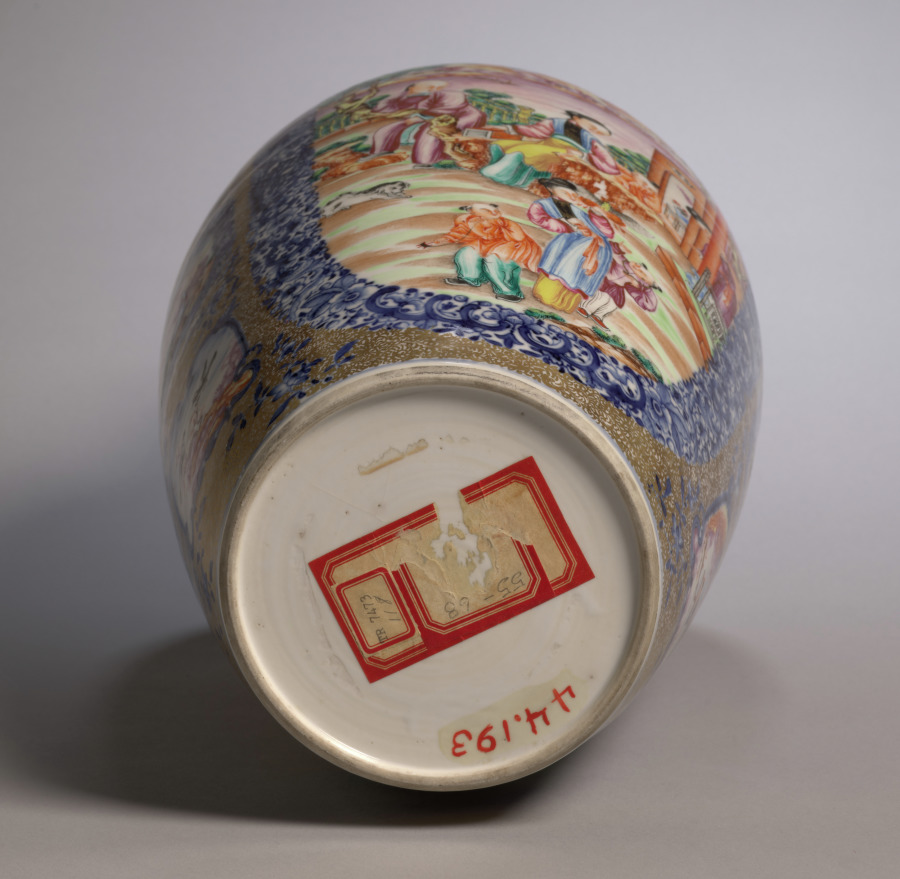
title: Vase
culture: China, Chinese Export, 18th century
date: c. 1770–80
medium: porcelain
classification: Ceramic